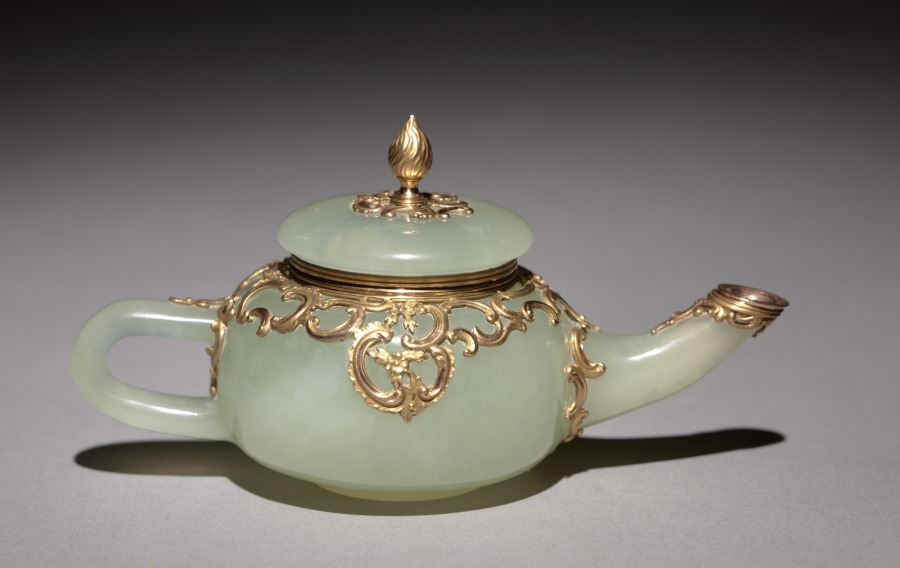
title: Miniature Teapot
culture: Russia, St. Petersburg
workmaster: Mikhail Evlampievich Perkhin (Russian, 1860–1903)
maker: House of Fabergé (Russian, 1842–1918)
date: 1886–96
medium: gold, bowenite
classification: Miscellaneous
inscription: Impressed marks: 56, crossed anchors [assay mark for St. Petersburg, 1882-96]; initials of workmaster Mikhail Perkhin (in Cyrillic); Fabergé (in Cyrillic)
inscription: Scratched: 47274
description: The House of Fabergé specialized in the creation of little treasures intended as opulent personal gifts. In creating luxurious accessories for a desk or tabletop, Fabergé often used native hardstones such as multicolored agate and quartz, green nephrite, pink rhodonite, rock crystal, and pale green bowenite found in the Ural Mountains of western Russia. Fabergé's designers often paired hardstones with gold mounts, particularly in the St. Petersburg workshop where the goldsmiths were concentrated.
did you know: Sometimes called "new jade," bowenite is actually considered a semiprecious gemstone. Though Fabergé obtained his supply from the Ural Mountains of Russia, bowenite is also the state mineral of Rhode Island.